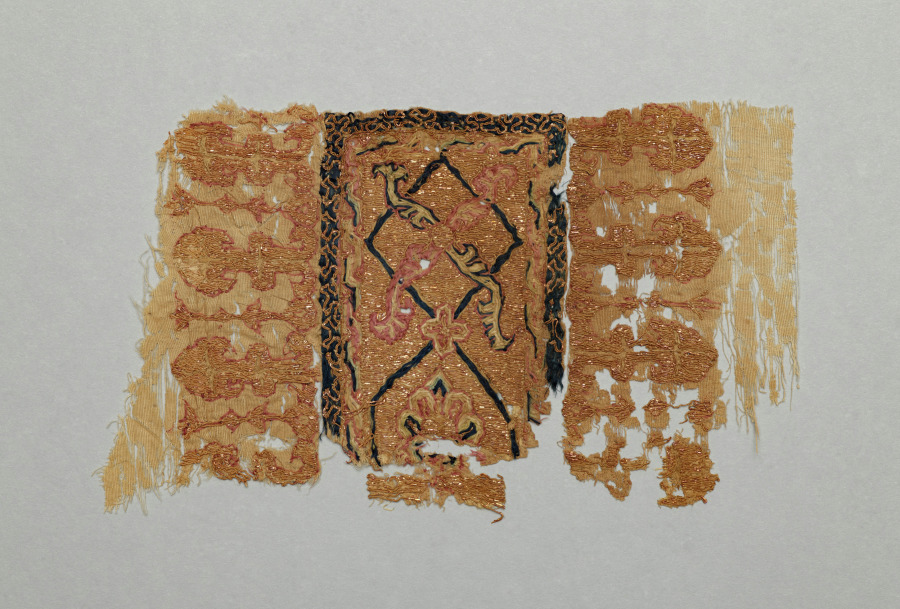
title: Fragment of an Embroidery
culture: Iran or Iraq, Seljuk period, 12th century A.D.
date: 1100s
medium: embroidery in silk and gold filé on mulham tabby ground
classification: Embroidery